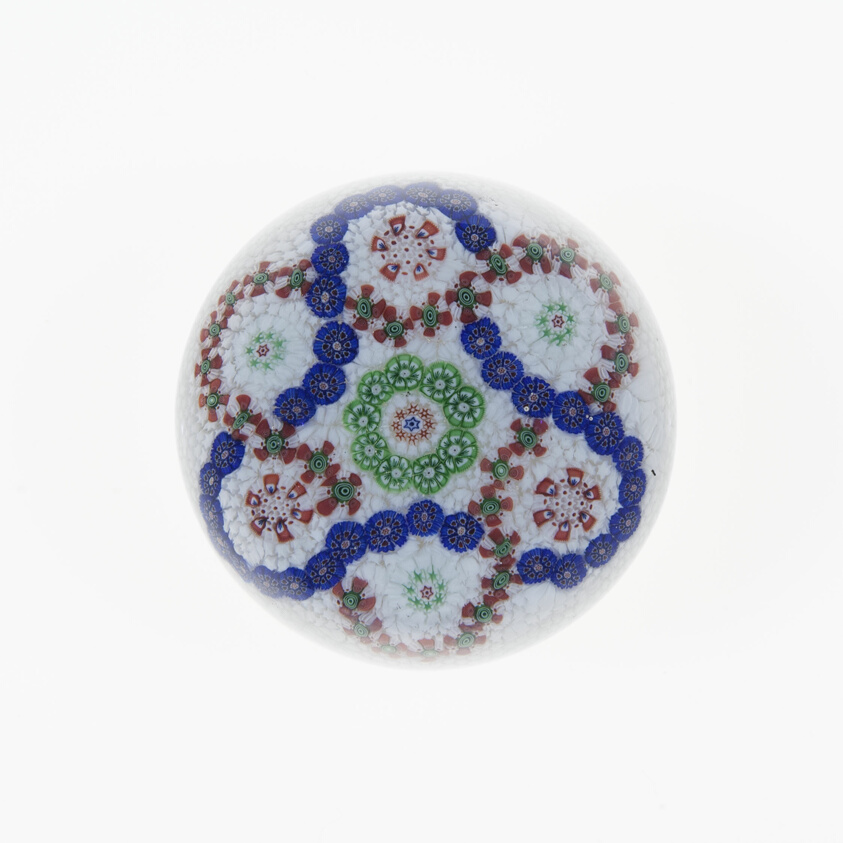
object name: Glass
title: Paperweight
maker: Baccarat Glassworks (Cristalleries de Baccarat); Lorraine, France, founded 1764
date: c. 1845/60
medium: Glass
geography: France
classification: paperweight; glass